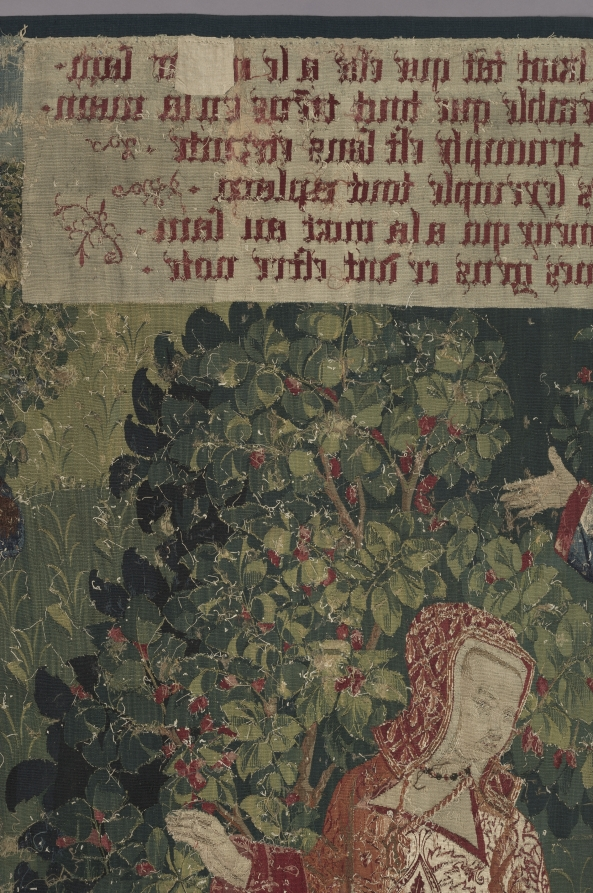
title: Youth (from Chateau de Chaumont set)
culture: France, Lyon(?), early 16th century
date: 1512–15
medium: silk and wool; tapestry weave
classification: Tapestry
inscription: French verse in Gothic letters translates as follows: Youth triumphs while its heart is healthy, And when it seems to hold all in its hand. But this triumph is without eternity. Here one sees the example full well: Those who are happy hide death in thier heart. Let the young heed this warning.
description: Louise of Savoy (1476-1531), queen mother of King Francis I, is depicted here in a sumptuous brocaded velvet in the center. She addresses youthful figures including Éléonore, Pierre Sala’s daughter who is facing her future husband, Hector. On the right, King Louis XII (died 1514) stands in front of the Chateau Langais where he had married Anne of Brittany. Above is Hector’s deceased father with a partially concealed skull under his robe, while a woman expresses surprise at the sight. The verse in Old French at the top states that youthful happiness is not eternal: Youth makes sounds as long as its heart is healthy, And thinks that it holds all in its hand. But this triumph is not eternal. Here you see clearly an example: He that is happy has death in his breast. Of this you people should take note.